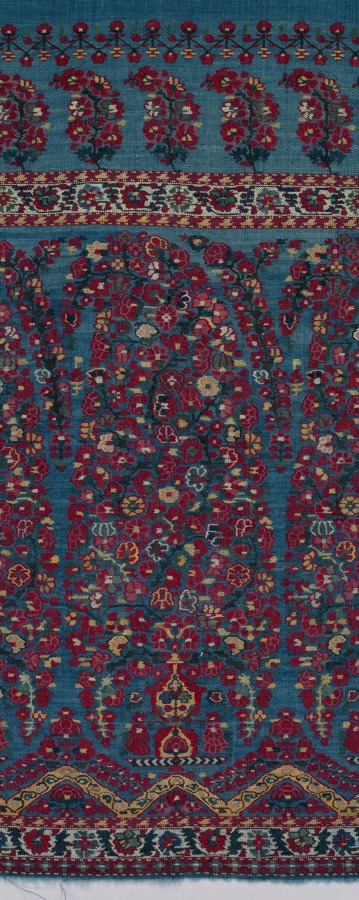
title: Shawl with boteh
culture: India, Kashmir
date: 1820–1830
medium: 2/2 twill tapestry weave, double interlocked: wool, possibly pashmina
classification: Textile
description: Thousands of luxurious shawls imported from Kashmir, India, were status symbols that European-manufactured imitations could not equal. Those woven in Paisley, Scotland, gave rise to the popular term paisley. Their representation in portraits records the evolution of shawl fashions, which helps to date surviving examples. The coveted quality of Kashmir shawls was achieved with luxurious fine goat hair woven in twill tapestry to form small colorful blossoms. Such shawls are lightweight, supple, and warm. A plethora of blossoms arranged in small vases on stands form the large paisley or boteh motifs, while smaller versions enliven the sides of the field. Such floral displays evolved from blossoming plants possibly in 16th-century India.